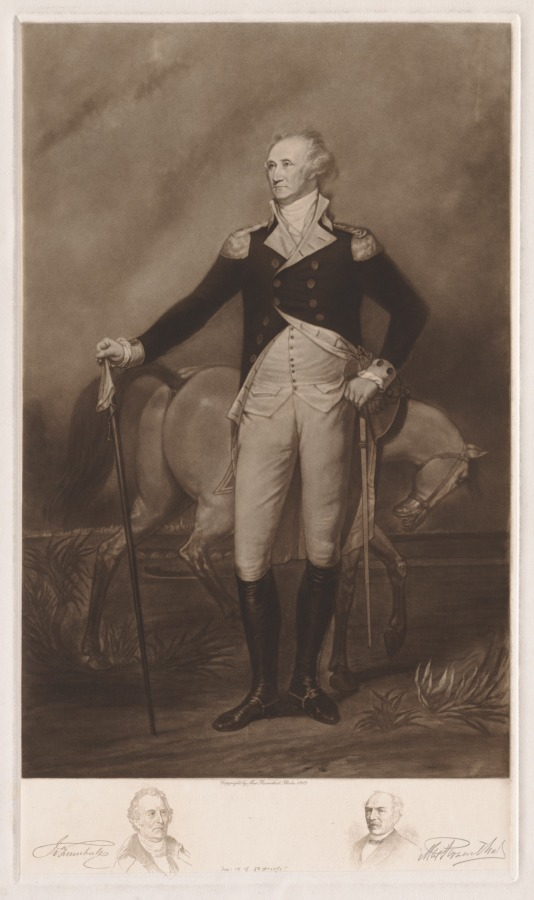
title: George Washington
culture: America, early 20th Century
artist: Max Rosenthal (American, 1833–1918)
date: 1903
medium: mezzotint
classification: Print